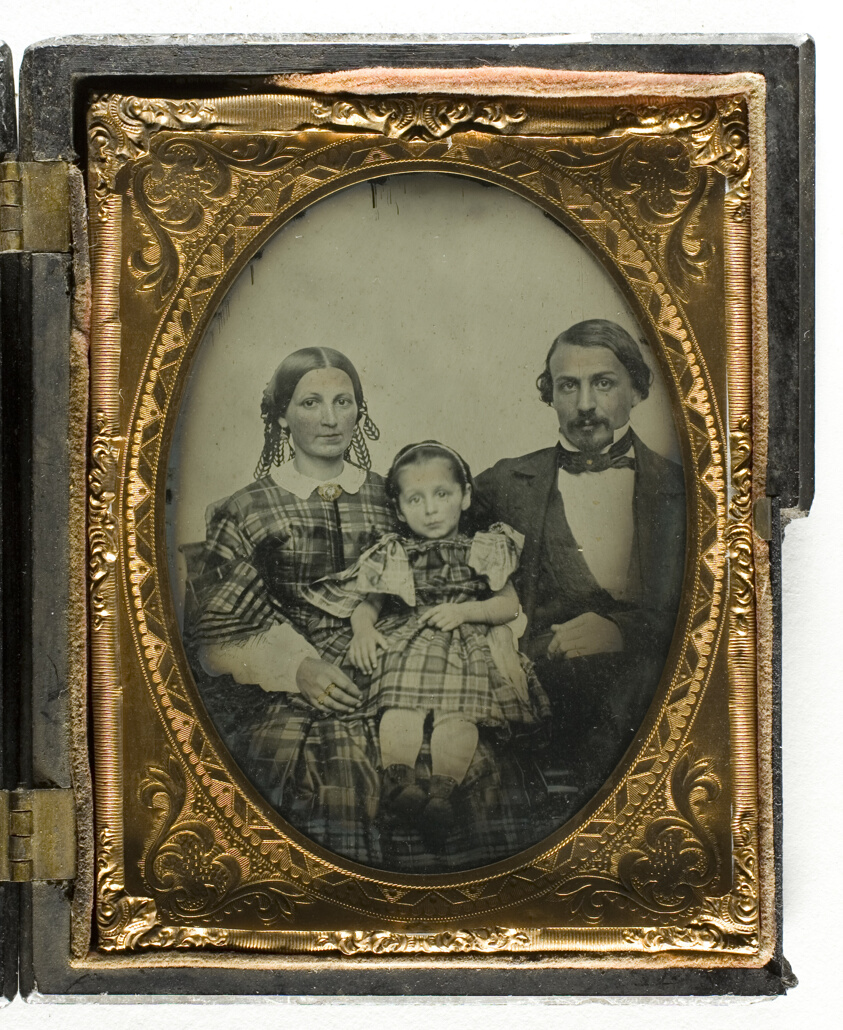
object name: Photograph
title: Untitled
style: 19th century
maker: Artist unknown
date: 19th century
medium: Daguerreotype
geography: Unknown Place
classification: daguerreotype; photographic process; photography; photograph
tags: portraits, portraits: male subject, photography, portraits: female subject, portraits: multiple subjects, portraits: child subject